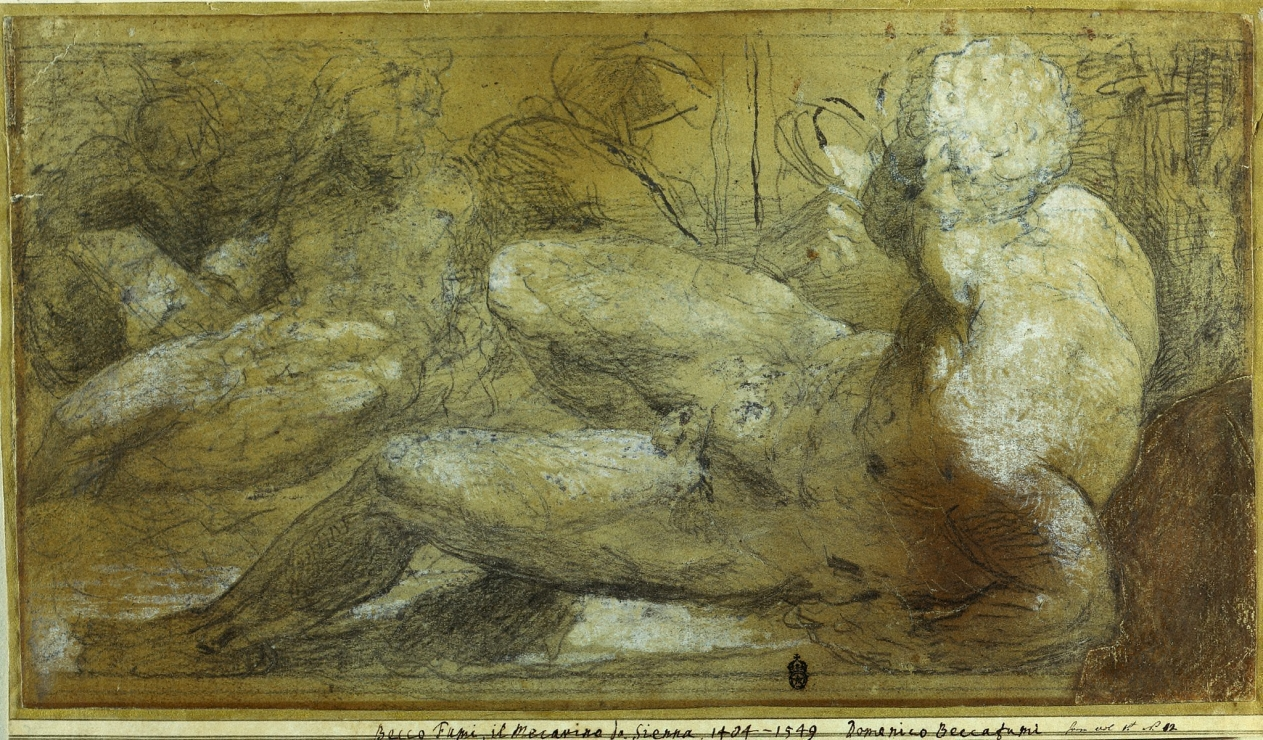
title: Three Male Nudes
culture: Italy, 16th century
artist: Domenico Beccafumi (Italian, 1486–1551)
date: c. 1540–47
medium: black chalk or charcoal with brush and black chalk or charcoal wash, heightened with white gouache; incised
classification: Drawing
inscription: tertiary support, along bottom, in brown ink: Becco Fumi, il Mecarino da Siena. 1404-1549 Domenico Beccafumi; lower right, in brown ink: from vol 1.st P. [1?]2.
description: Domenico Beccafumi was intensely aware of the work of his contemporary Michelangelo when he developed his own style for projects in Siena, south of Florence. This drawing is a study for a chiaroscuro print, a type of woodblock print using several blocks, some colored, to create light and shadow. The drawing features three male nudes whose roles are unknown. The closest figure, reclining with his back toward the viewer, recalls ancient sculptures of river gods as well as works by Michelangelo, including the reclining figures he sculpted for the Medici tombs in Florence.